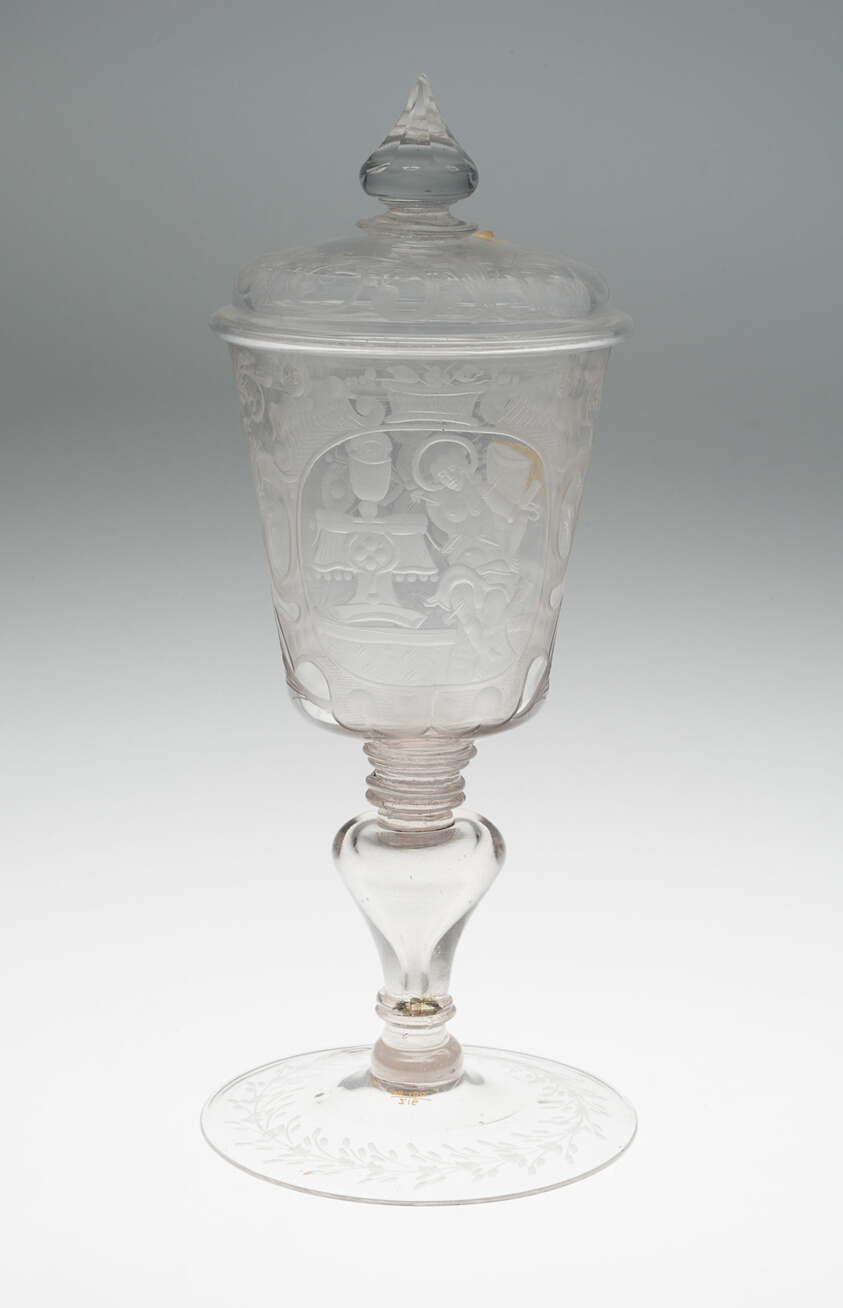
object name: Glass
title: Goblet with Cover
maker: Germany, Rhineland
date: 18th century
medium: Glass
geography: Rhineland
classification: drinking vessel; glass; european decorative arts